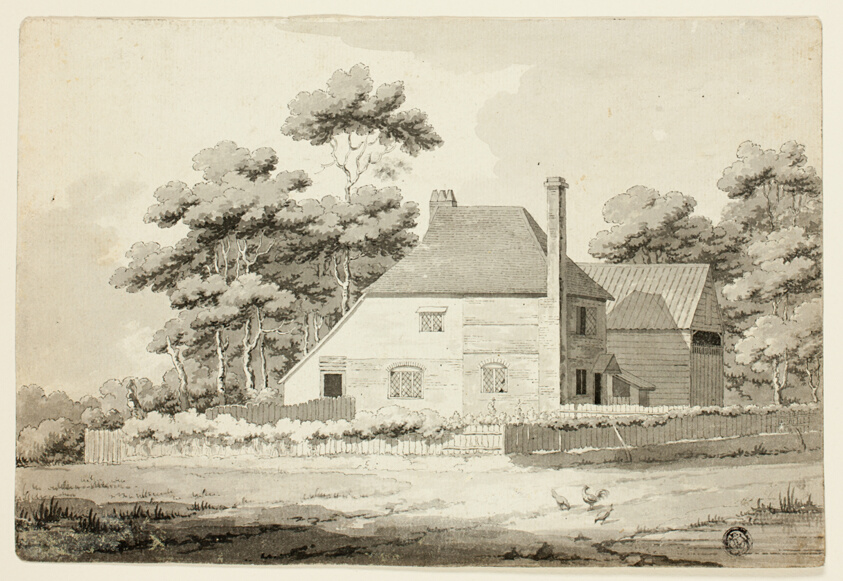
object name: Drawing and Watercolor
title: English Farmhouse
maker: Possibly Samuel Hieronymus Grimm (Swiss, 1733-1794); or John White Abbott (English, 1763-1851); or Francis Grose (English, c. 1731-1791); or Paul Sandby (English, 1725-1809); or Thomas Sandby (English, 1721-1798); or Francis Towne (English, 1739/40-1816)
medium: Pen and black ink, with brush and gray wash, on ivory laid paper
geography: Switzerland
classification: ink or chalk wash; drawings (visual works); prints and drawing